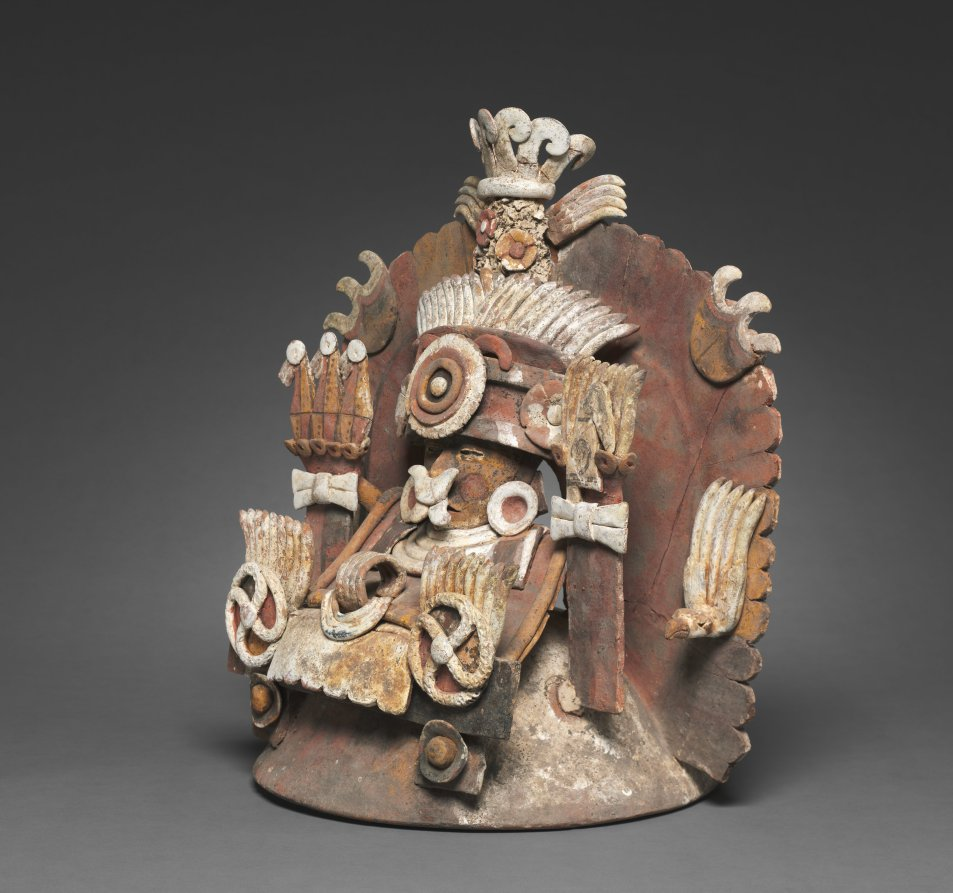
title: Incense-burner Cover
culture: Guatemala, Escuintla Region, early 6th Century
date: c. 500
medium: earthenware with slip and pigments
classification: Ceramic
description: This elaborate clay construction served as the cover and chimney of a basin used to burn copal incense. Although probably manufactured in what is now Guatemala, the form and fabrication are based on examples from Teotihuacan in central Mexico, hundreds of miles away. Intensive trade between the two regions, or even a Teotihuacan colony in Guatemala seems likely. The masked, dressed, and ornamented moundlike form probably represents a mortuary bundle or a cult image.